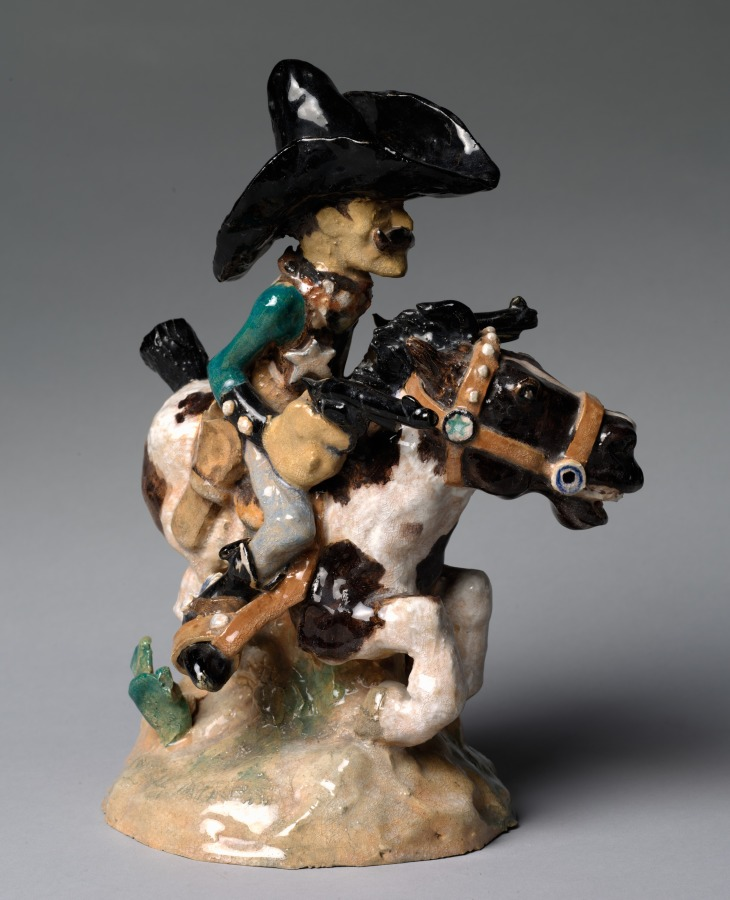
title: Sheriff of Pecos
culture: America, Ohio, Cleveland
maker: Russell Barnett Aitken (American, 1910–2002)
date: 1931–32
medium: ceramic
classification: Ceramic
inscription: Signed on the base on the back side "Russell Aitken"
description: Figural studies were emphasized in ceramics classes at the Kunstgewerbeschule, where Clevelanders Viktor Schreckengost and Russell Barnett Aitken studied in 1929–30. Aitken absorbed the Viennese style of exaggeration and caricature as seen in this depiction of a popular folk hero of the Wild West, incorporating such motifs into his work for the rest of his career.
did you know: Caricature, or the exaggeration of prominent features, was a hallmark of Russell Barnett Aitken's style of modeling figures.